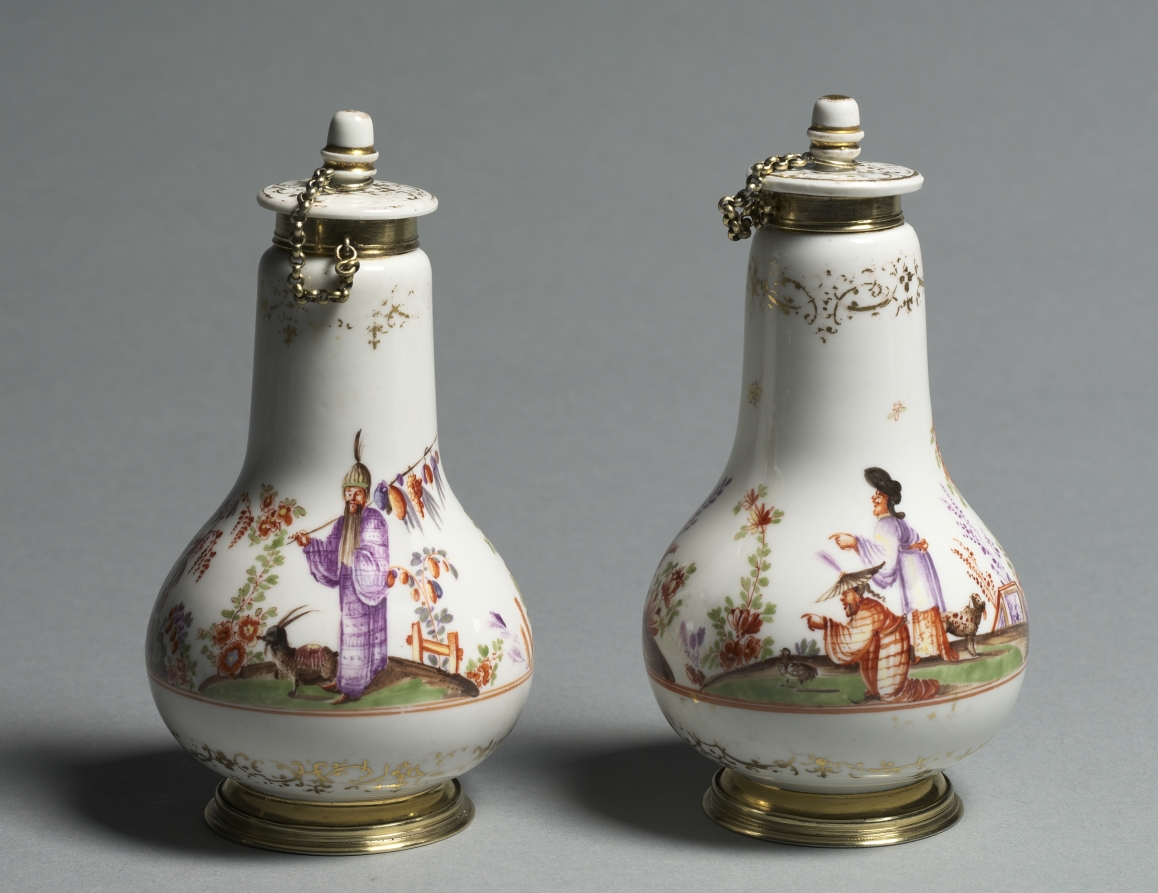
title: Covered Flasks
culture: Germany, Meissen, 18th century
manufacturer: Meissen Porcelain Factory (German, est. c. 1710)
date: c. 1720–1723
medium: porcelain with gilt metal mounts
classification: Ceramic